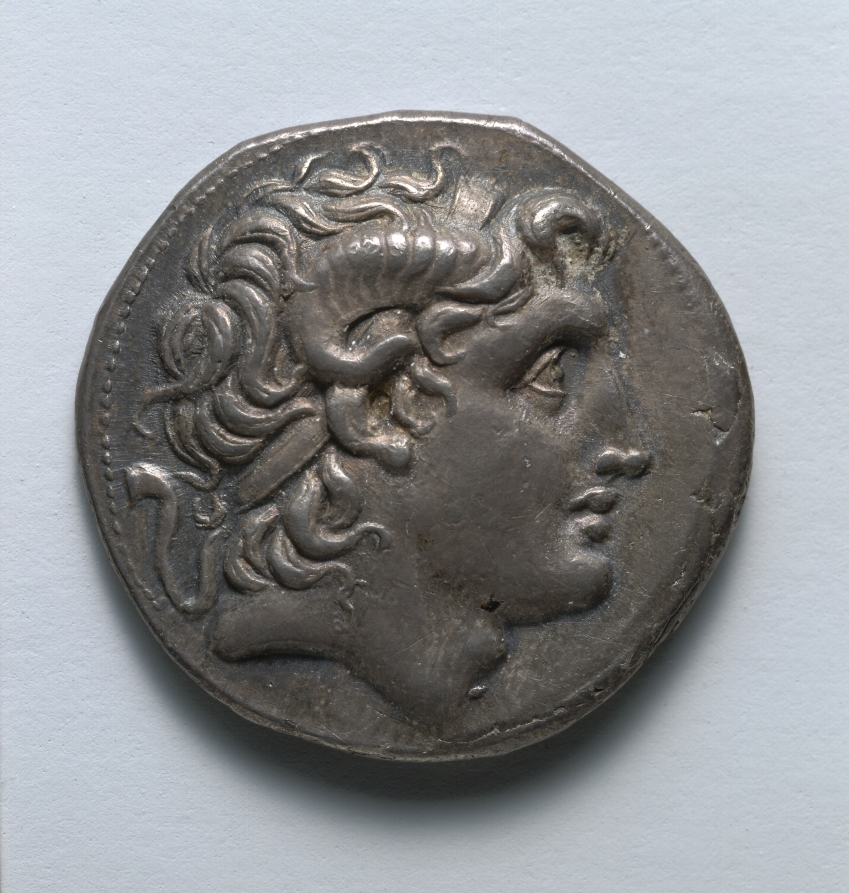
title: Tetradrachm: Head of Alexander III [The Great] (obverse)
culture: Greek, Macedonian, minted at Lysimachia (Thrake), reign of Lysimachos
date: 297–281 BCE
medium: silver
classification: Coins